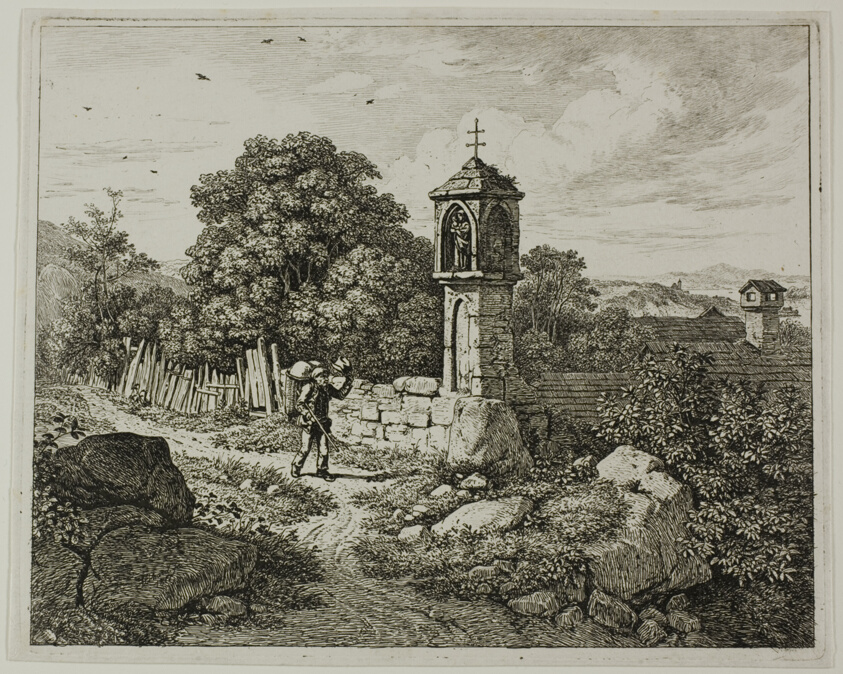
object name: Print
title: Farmer Greeting a Roadside Shrine of the Madonna, plate one from Die zwei grossen Landschaften mit den Betsäulen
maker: Johann Christoph Erhard (German, 1795-1822)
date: 1817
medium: Etching on white paper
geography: Germany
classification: etching; print; prints and drawing